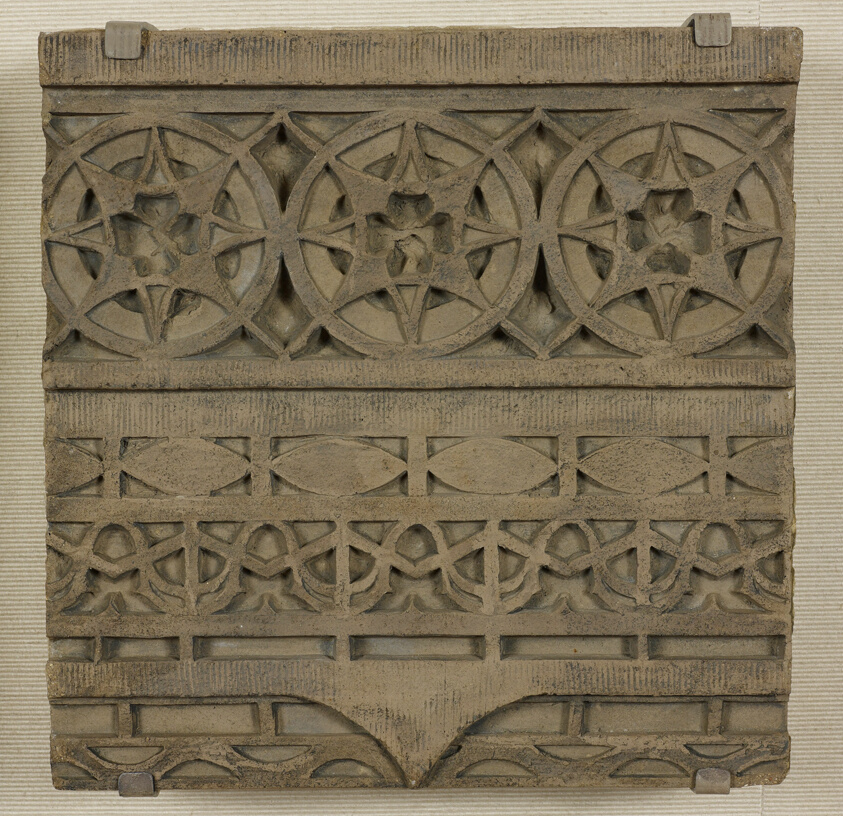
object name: Architectural fragment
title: Chicago Stock Exchange Building, Facade Panel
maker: Adler & Sullivan; American, 1883–1895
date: 1894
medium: Terra-cotta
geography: Chicago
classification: architectural sculpture; architectural fragment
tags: Chicago